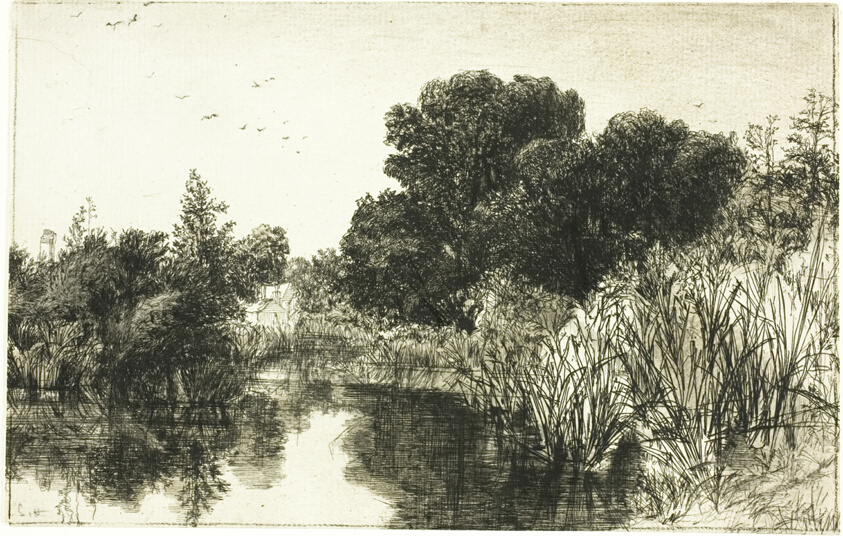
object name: Print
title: Shere Mill Pond, No. II (large plate)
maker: Francis Seymour Haden (English, 1818-1910)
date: c. 1860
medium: Etching with drypoint on ivory laid paper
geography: England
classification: etching; print; prints and drawing